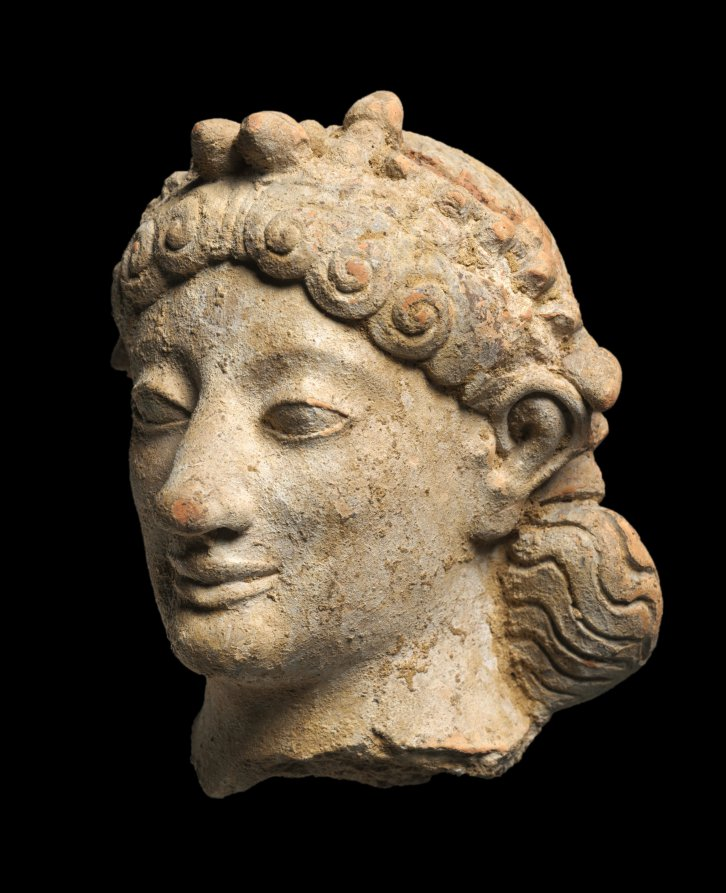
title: Head of Artemis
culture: Greece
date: 600–575 BCE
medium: terracotta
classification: Sculpture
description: Artemis was the goddess of hunting. Her long straight nose, almond-shaped eyes, and "archaic smile" are very similar to those of Atalanta on the contemporary white-ground lekythos (1966.114)